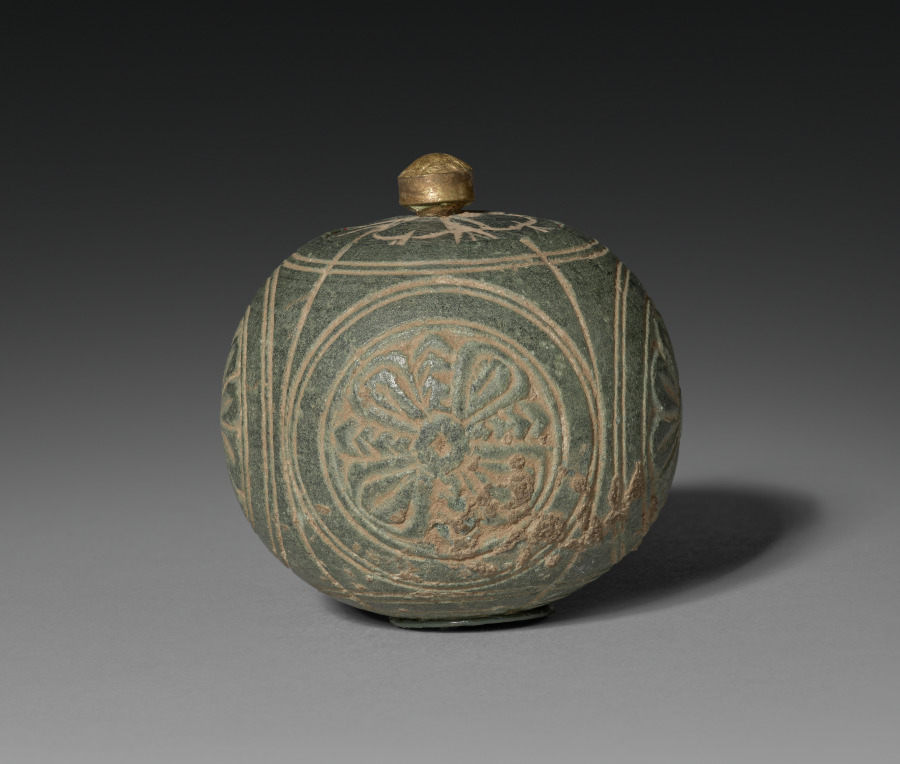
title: Miniature Stone Reliquary or Toilette Casket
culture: Pakistan, Gandhara, probably Sirkap, early Kushan period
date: 1–100 CE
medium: gray schist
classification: Sculpture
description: Tiny reliquaries holding the cremated remains of the Buddha or a high-ranking holy person empowered monuments and made them sacred. A Buddhist monument, such as the solid hemispherical mounds called stupas, would not be worshipped until it was consecrated with the relic secreted inside. Bits of ash were combined with tiny gems inside a crystal or glass reliquary, which was then placed inside a stone or metal container, like the lidded versions seen here. These containers look like cosmetic vessels for aromatic pastes used for perfume in ancient India. Buddhist texts state that the enlightened Buddha emitted a fragrance like sandalwood paste; the form of the reliquary as a perfume bottle indicates the presence of the Buddha by the visual reference to his pleasant scent. Once enclosed in the stupa the reliquaries would not be seen, but monks were tasked with applying sandalwood paste to the exterior of stupas as part of their regular maintenance to convey to visitors the ongoing presence of the Buddha radiating from the relic in the center.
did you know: The knob of the lid is gilded, as is the interior of the casket.